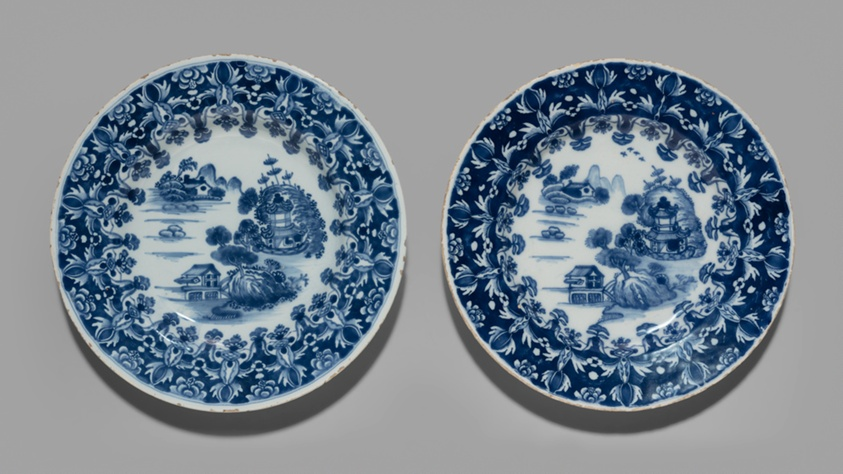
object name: Ceramics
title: Plate in the Three Chinese Houses Pattern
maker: Dublin, Ireland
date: 1760/70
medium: Tin-glazed earthenware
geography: Dublin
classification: earthenware; plate (general, dish); decorative arts; ceramics; european decorative arts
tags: landscapes, Chinoiserie